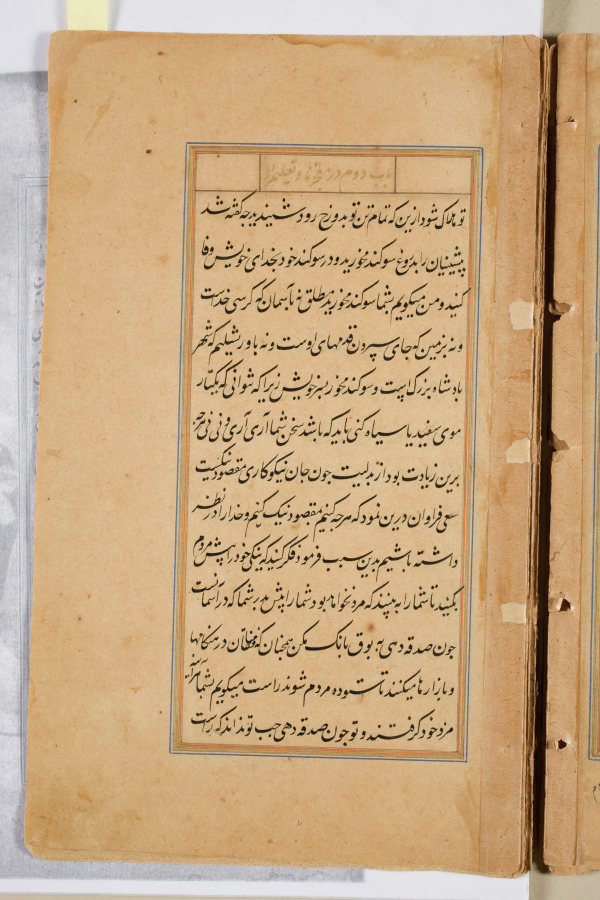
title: Text page from a Mirror of Holiness (Mir’at al-quds) of Father Jerome Xavier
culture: Mughal India, Allahabad, made for Prince Salim (1569–1627)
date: 1602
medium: Ink and gold on paper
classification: Manuscript